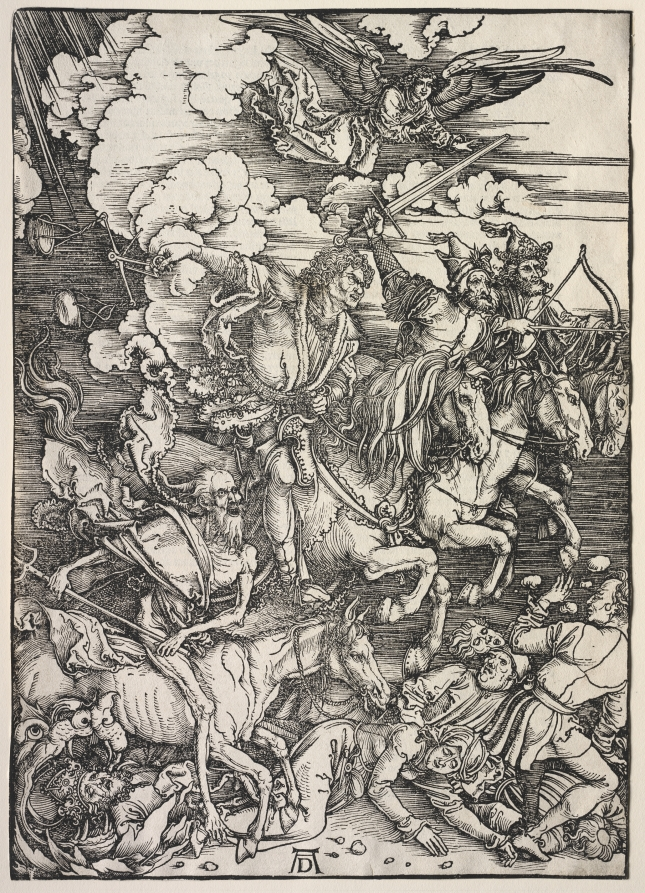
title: Revelation of St. John: The Four Horsemen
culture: Germany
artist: Albrecht Dürer (German, 1471–1528)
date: 1511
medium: woodcut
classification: Print